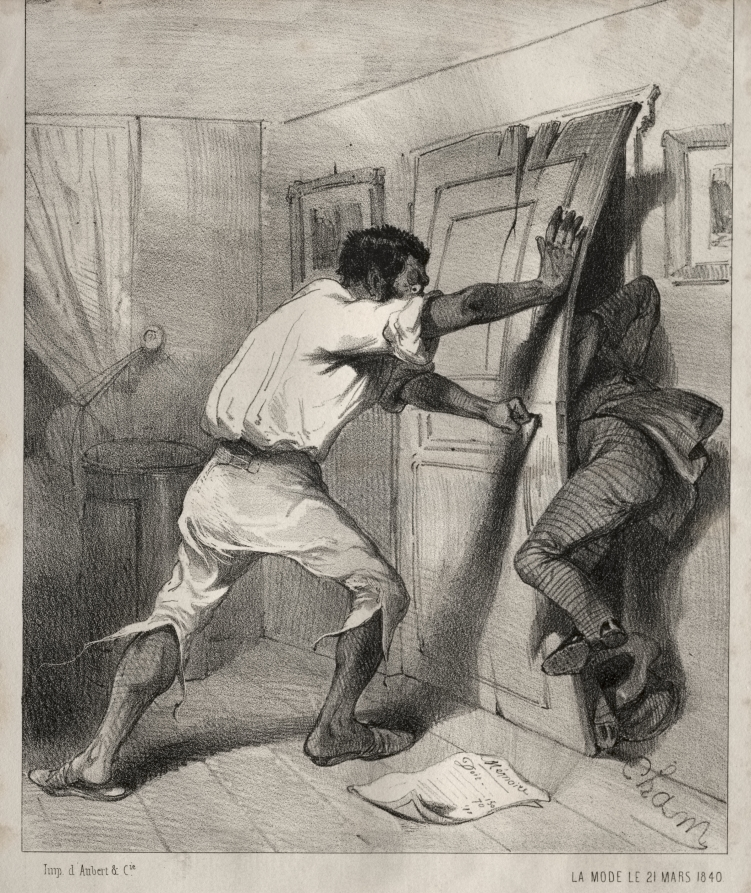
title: Un Créancier trop pressé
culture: France, 19th century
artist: Cham (French, 1818–1879)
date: 1840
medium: lithograph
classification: Print